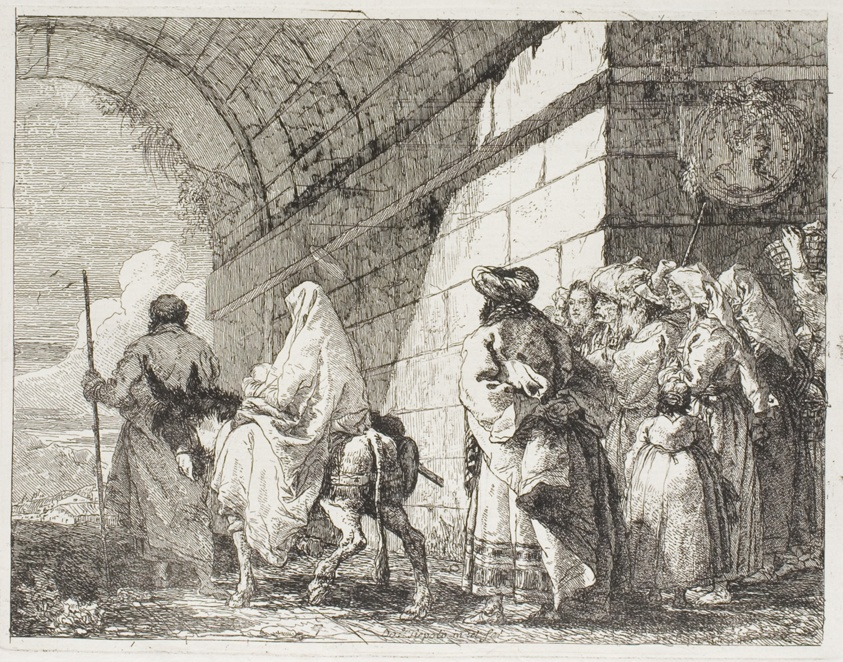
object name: Print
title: The Holy Family Leaving by a City Gate, plate seven from The Flight into Egypt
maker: Giovanni Domenico Tiepolo (Italian, 1727-1804)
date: 1753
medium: Etching on paper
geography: Italy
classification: etching; print; prints and drawing